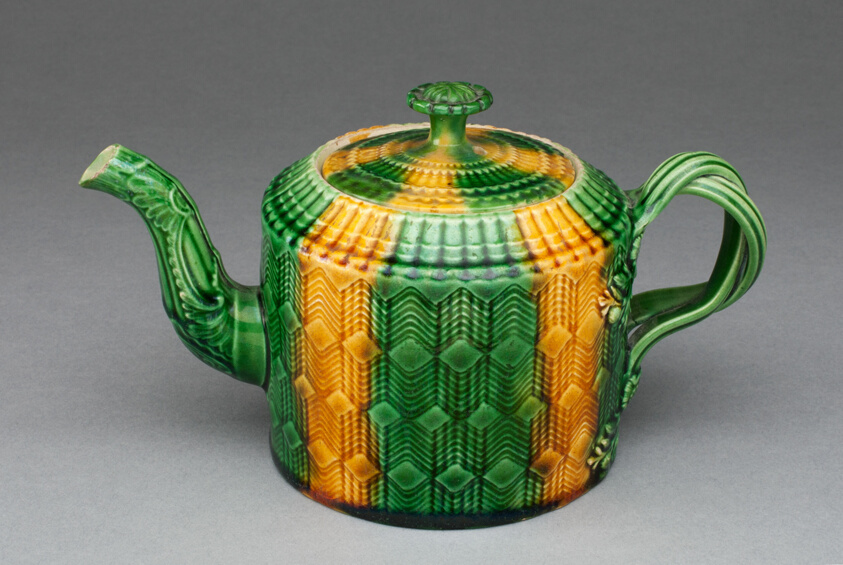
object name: Ceramics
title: Teapot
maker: Staffordshire, England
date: 1760/75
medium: Lead-glazed earthenware (creamware)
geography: Staffordshire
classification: teapot; european decorative arts; earthenware; ceramics; creamware; lead-glazed earthenware